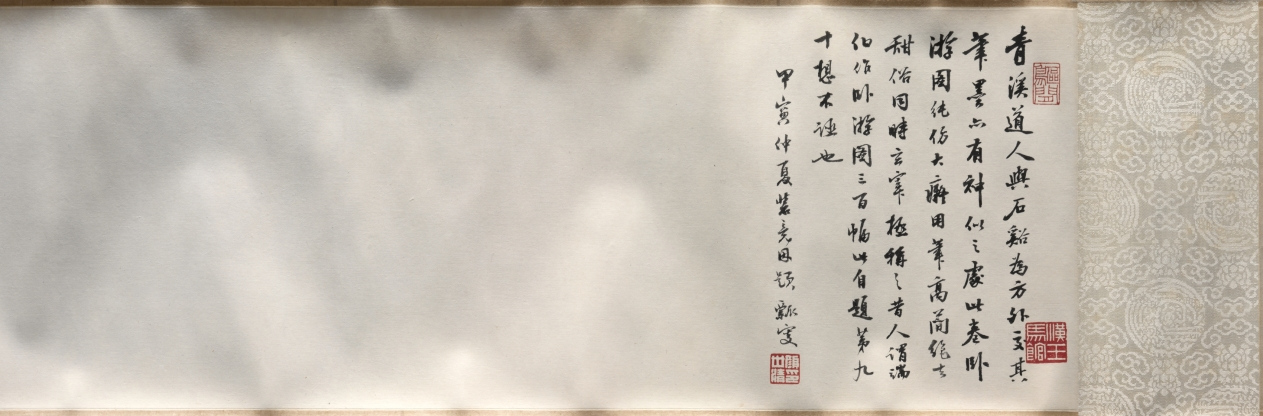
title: Dream Journey among Rivers and Mountains, no. 90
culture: China, Qing dynasty (1644-1911)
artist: Cheng Zhengkui (Chinese, 1604–1676)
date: 1658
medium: Handscroll; ink and color on paper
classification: Painting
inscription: 江山臥遊圖其九十, 青溪道人, 戊戌夏五。 [印] 程正揆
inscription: Title and inscription by Huang Yi 黃易 (1744–1802), and 3 seals.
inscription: 1 colophon and 9 additional seals: 3 seals of Dai Zhi 戴植 (active about 1821–1850); 1 colophon, dated 1914, and 3 seals of Yan Shiqing 顏世清 (1873–1929); 3 seals of Wang Nanping 王南屏 (1924–1985).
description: Cliffs and waterfalls interspersed with trees and dotted vegetation are spread over this handscroll. Long paths wind their way through villages, beside cottages, shrines, and over bridges. In the past, Chinese literati officials liked to take a “dream journey” along mountains and rivers when viewing landscape paintings in their studios. Scenery of this kind thus became a way to escape from the world of bureaucracy and administration. The painter Cheng Zhengkui used the title “Dream Journey” for a whole series of paintings, of which this is number 90. He is said to have painted 500 of them, but the actual count remains unknown.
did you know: Cheng Zhengkui planned to make 100 dream journey paintings but may have ultimately made 500.